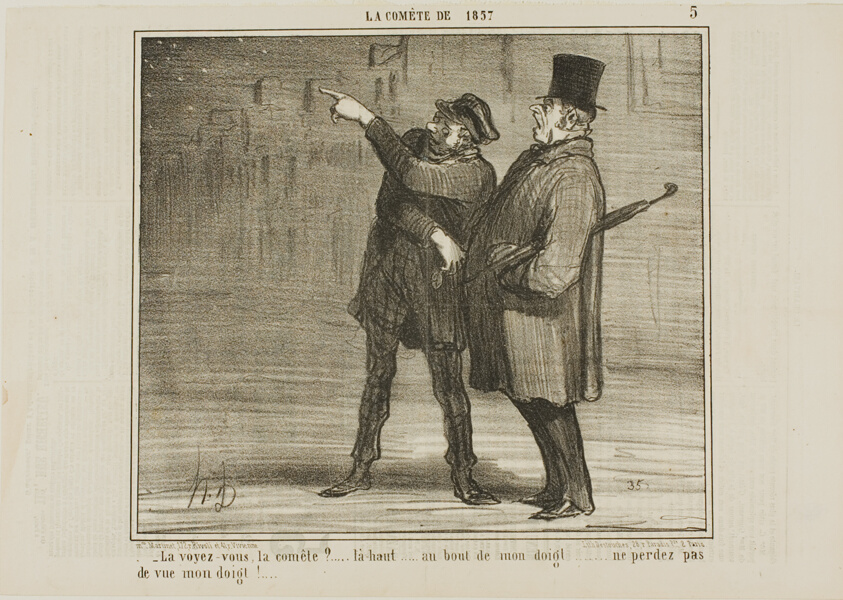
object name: Print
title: "- Can you see the comet?... just there, at the tip of my finger ... don't lose sight of my finger tip!," plate 5 from La Comète De 1857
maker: Honoré Victorin Daumier; French, 1808-1879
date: 1857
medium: Lithograph in black on ivory wove paper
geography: France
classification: lithograph; print; prints and drawing